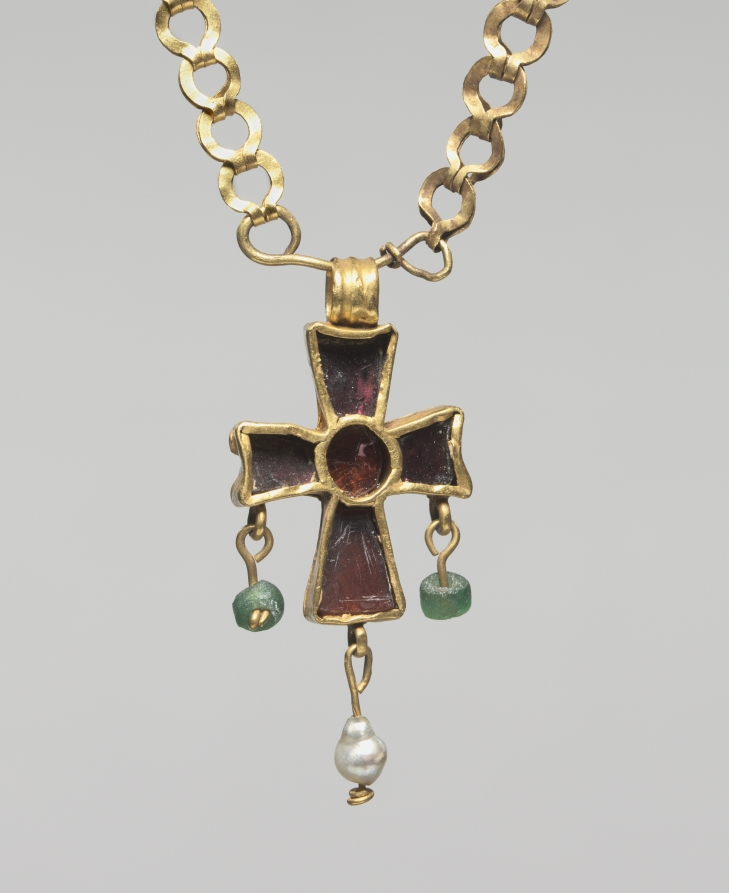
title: Chain with Pendant Cross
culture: Byzantium, early Byzantine period, 6th century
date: 500s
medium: gold, glass, pearl, garnet, and sapphire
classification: Jewelry